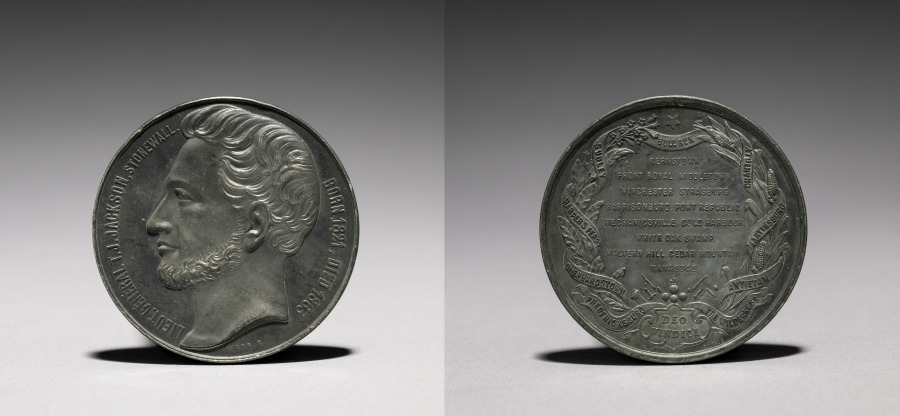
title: Medal: Lieutenant General T. J. Jackson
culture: France, 19th century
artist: Armand Auguste Caqué (French, 1793–1881)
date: c.1824–63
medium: bronze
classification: Metalwork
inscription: Lieut. General T. J. Jackson, Stonewall. Born 1821. Died 1863.